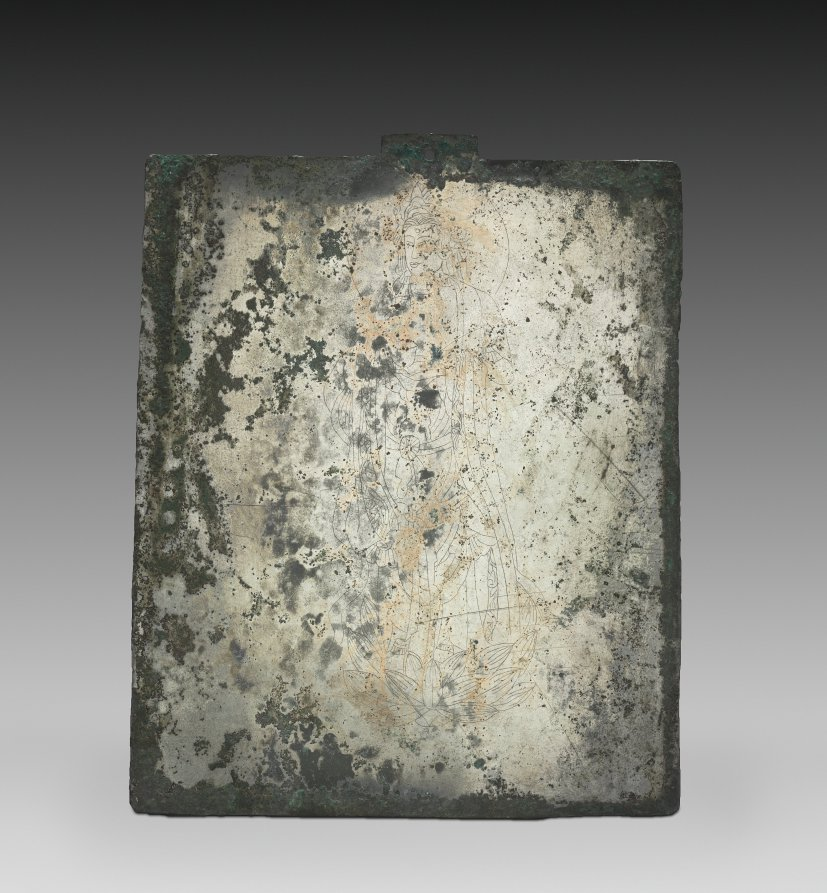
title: Mirror with the Image of Avalokitesvara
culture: Korea, Joseon dynasty (1392–1910)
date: early 1900s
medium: bronze with incised Buddhist designs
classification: Metalwork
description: Mirrors, along with swords and jade, were among the most important symbols of power. It is thought that mirrors held power through their ability to catch and reflect light. This rare trapezoid-shaped example is engraved with an image of the Avalokitesvara, Bodhisattva of Compassion and was used as a part of Buddhist rituals.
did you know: Due to its origin as an important tool in religion and politics, mirrors are often mentioned in many Korean proverbs that warn certain behaviors.